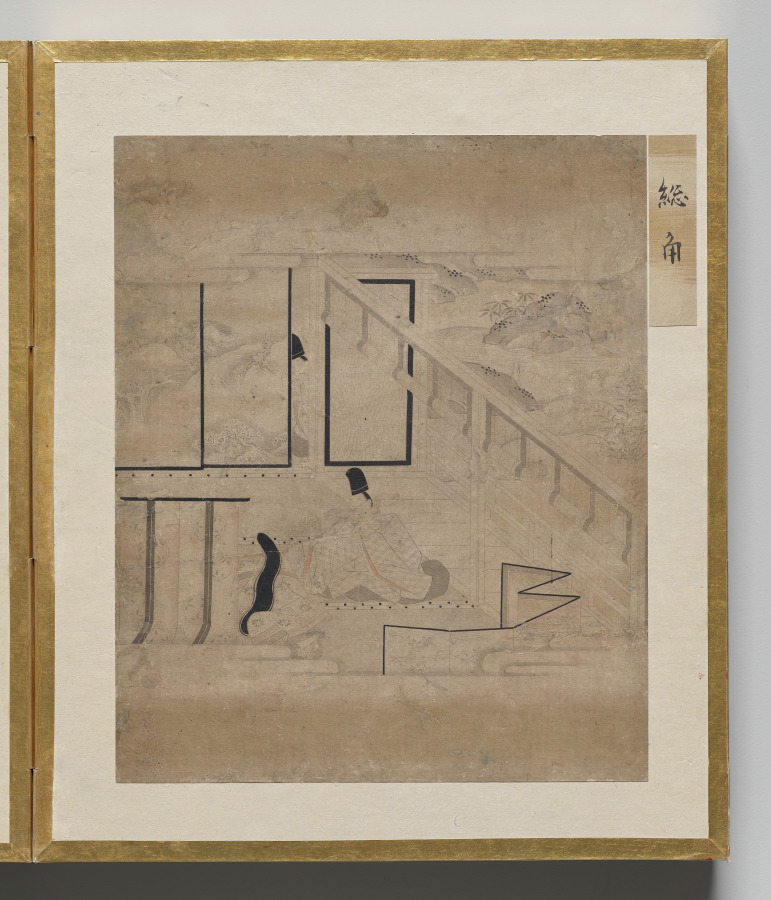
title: Trefoil Knots from Album of Illustrations for the Tale of Genji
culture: Japan, Edo period (1615–1868)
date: 1600s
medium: painting in an accordion-style album; ink, light color, and gold on paper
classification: Bound Volume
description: This album contains illustrations for the classic literary work the Tale of Genji, authored in the 1000s by Murasaki Shikibu, an aristocrat of the Heian period (794–1185) court. The scenes are painted in the “white drawing” (hakubyō) mode, in which a fine ink line is used to depict figures and spaces with great subtlety, punctuated only occasionally by traces of red pigment for a character’s lips, a detail of a garment, or a decorative element. These two scenes illustrate episodes from the chapters “Thin Veil of Cloud” (Usugumo) and “Barrier Gate” (Sekiya).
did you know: The illustrations are identified by chapter title in cartouches to the upper right of the paintings.